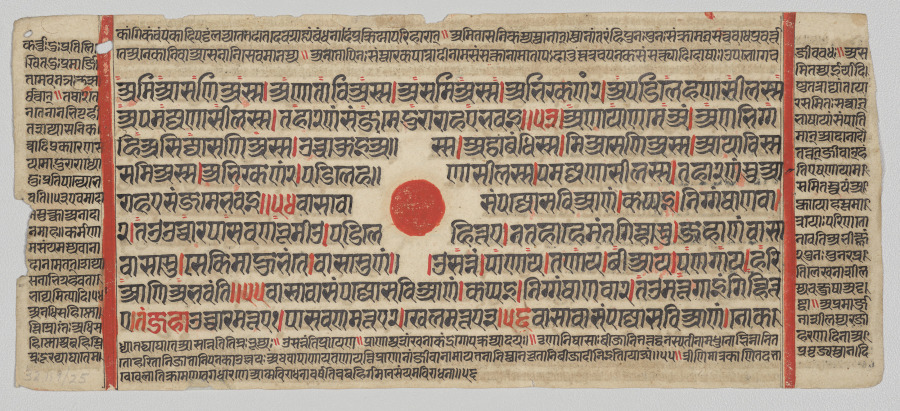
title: Text, Folio 76 (recto), from a Kalpa-sutra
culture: Western India, Gujarat, last quarter of the 15th century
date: c. 1475–1500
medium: Gum tempera, ink, and gold on paper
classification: Painting